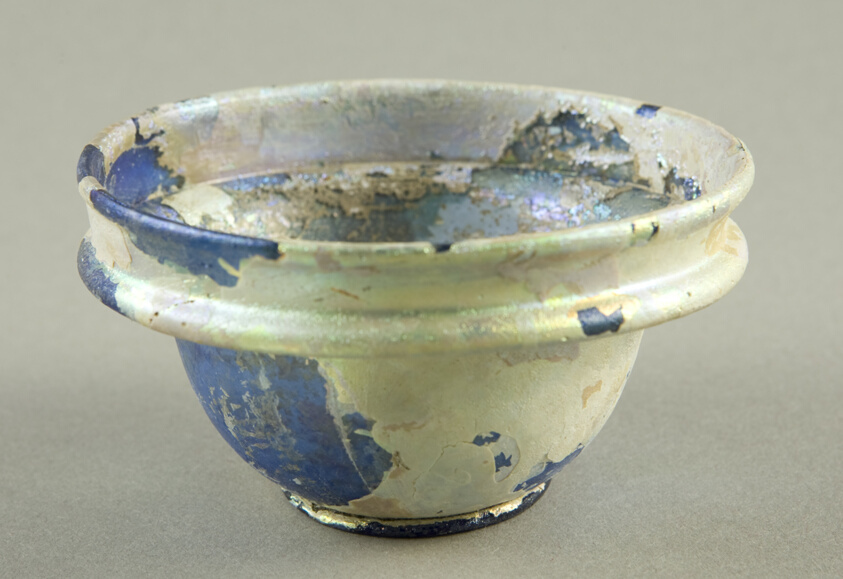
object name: Vessel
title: Cup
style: ancient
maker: Ancient Mediterranean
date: 1st century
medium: Glass, blown technique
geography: Mediterranean Region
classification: drinking vessel; glass; vessel; ancient art